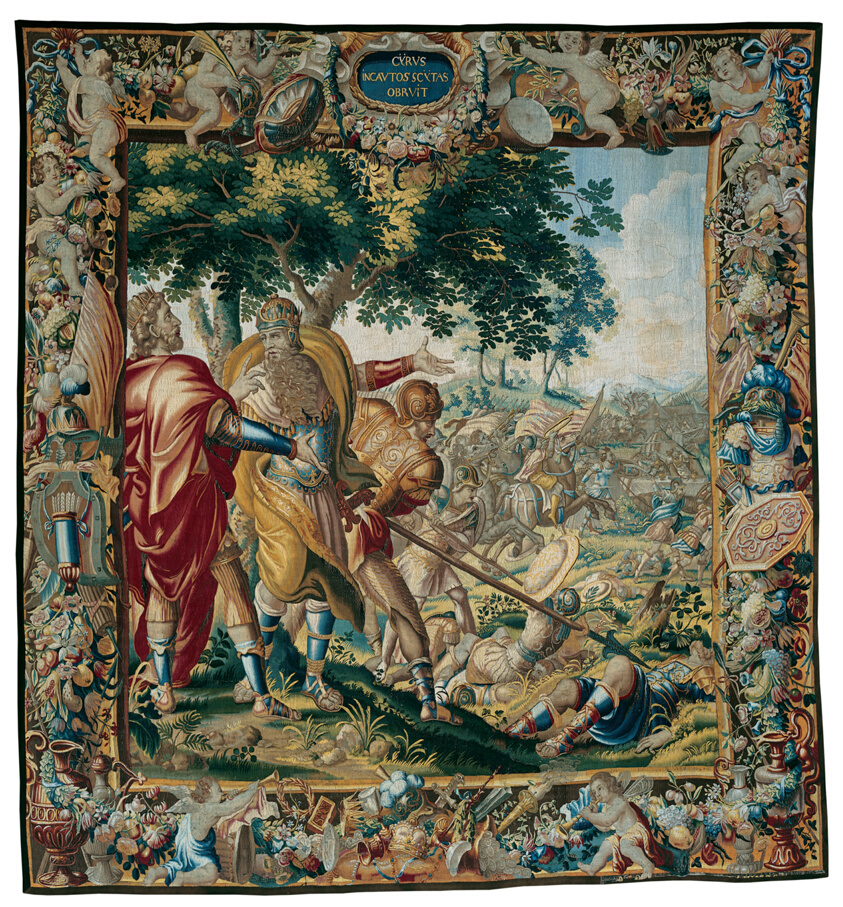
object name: Textile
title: Cyrus Defeats Spargapises, from The Story of Cyrus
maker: Adapted from designs by Michiel Coxie (1499–1592); Woven at the workshop of Albert Auwercx (1629–1709); Flanders, Brussels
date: c. 1670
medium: Wool and silk, slit and double interlocking tapestry weave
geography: Flanders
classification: weaving - tapestry; weaving; textile